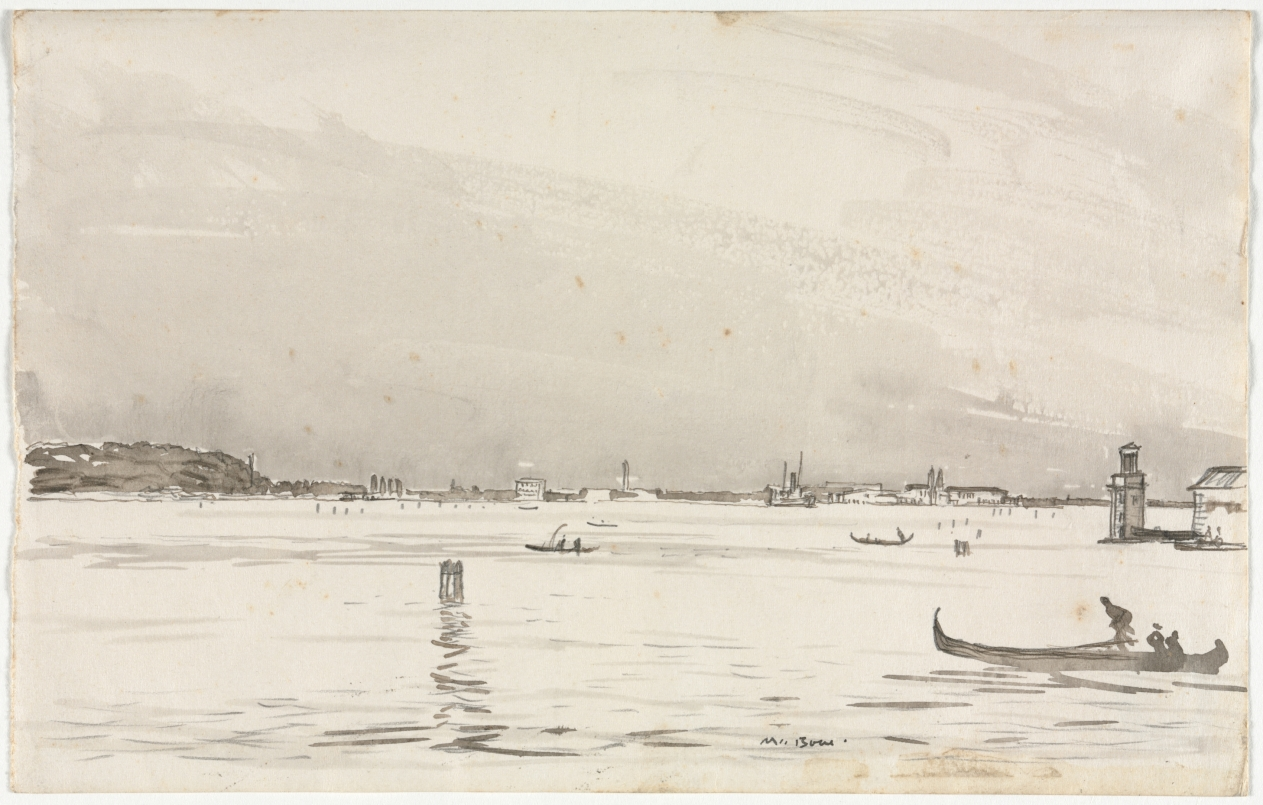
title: Lagoon, Venice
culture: England, 20th century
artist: Muirhead Bone (British, 1876–1953)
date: c. 1920–53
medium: brush and wash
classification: Drawing